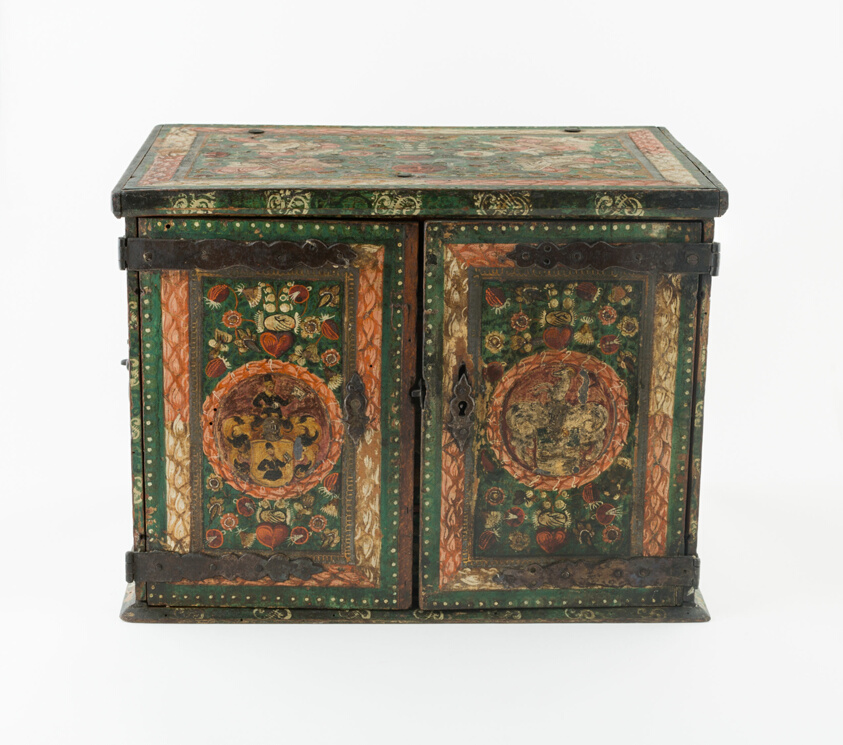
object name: Furniture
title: Marriage Chest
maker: Bavaria, Germany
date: Early to mid 18th century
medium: Wood, painted and gilded; metal mounts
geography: Germany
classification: case furniture; furniture; european decorative arts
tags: furniture